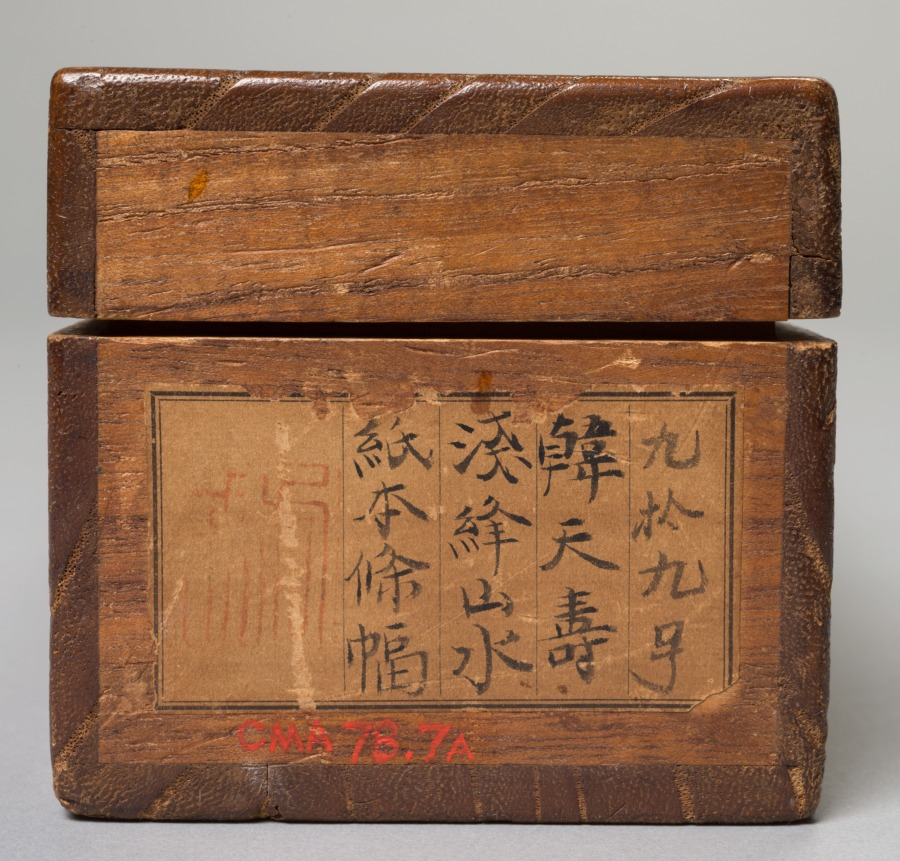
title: Landscape with Gentle Peaks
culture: Japan, Edo period (1615–1868)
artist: Kan Tenju (Japanese, 1727–1795)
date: 1767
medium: hanging scroll; ink and light color on paper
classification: Painting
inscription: 雨過嵐光煙／雲陽樹影諫／夕陽独在左／？卷讀残書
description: A figure sits in a retreat tucked into the mountains near a waterfall. The painter, Kan Tenju, was best known as a calligrapher and seal carver. Of Korean heritage, he was a patron of artist Ike Taiga (池大雅) (1723–1776), and a cousin of Taiga’s student Aoki Shukuya (青木 夙夜) (died 1802). His Chinese-style poem reads as follows: Smoky mist in the mountain reflects light after the rain, Sunlight passes through the clouds to cast shadows of the trees, Alone in the sunset, I read a well-worn book.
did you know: This painting combines image and calligraphy, connected by skillful brushwork.